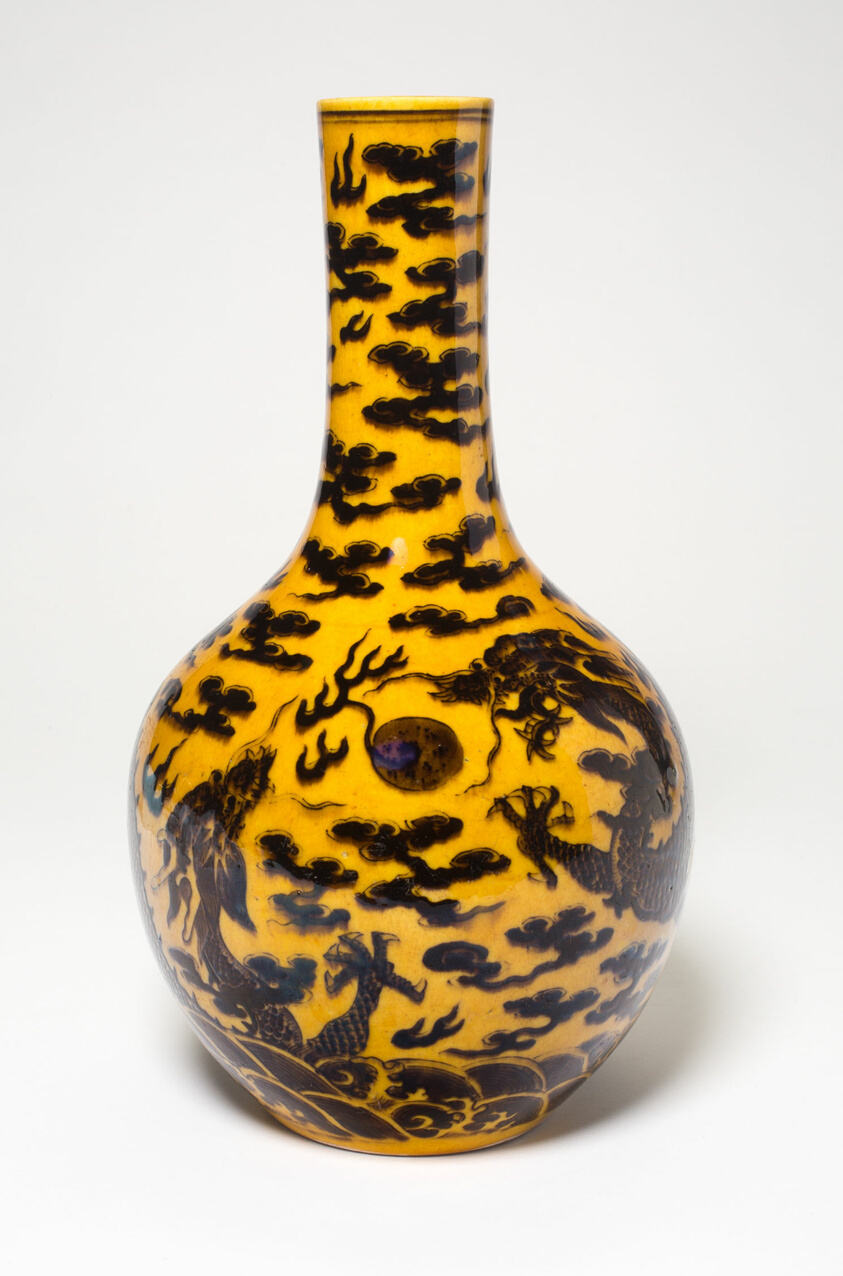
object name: Vessel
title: Yellow and Brown-Enameled 'Dragon' Bottle Vase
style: Chinese (culture or style)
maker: China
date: Qing dynasty (1644–1911), Kangxi period (1662–1722)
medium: Porcelain with overglaze yellow and brown enamels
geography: China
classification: vase; vessel; porcelain; asian art; ceramics